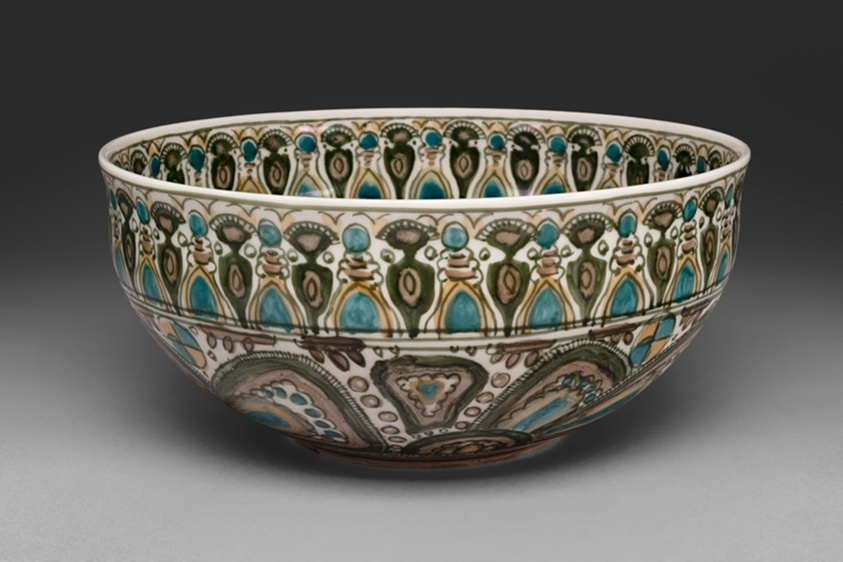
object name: Ceramics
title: Bowl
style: Modernism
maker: Designed by Edward Middleton Manigault (American, born Canada, 1887–1922); Manufactured by Lenox, Inc. (American, founded 1889); Trenton, New Jersey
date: 1917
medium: Porcelain with enamel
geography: Trenton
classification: decorative arts; american decorative arts; art of the americas; pottery; enamel; porcelain; bowl; ceramics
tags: dining, drinking